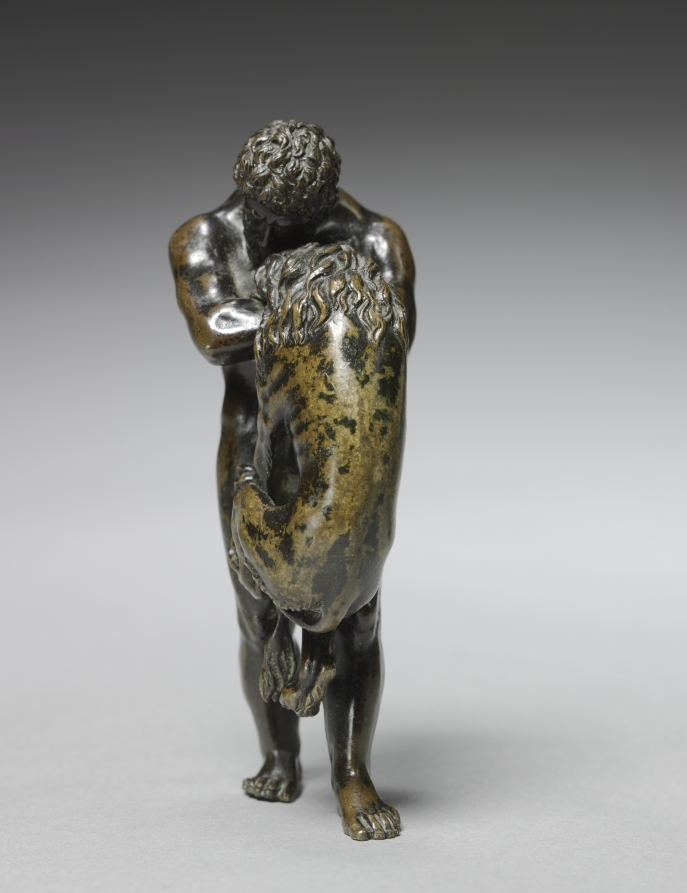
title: Hercules and the Nemean Lion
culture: Italy or France, 16th century or later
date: 1500s or later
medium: bronze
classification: Sculpture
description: The original owner of this work would have understood that this scene referred to the entire story of Hercules, the demi-god who had to accomplish twelve labors. The lion is named after the city of Nemea, near Corinth, a monstrous beast sent by the goddess Hera to wreak havoc on the area. After killing the lion, Hercules wore his pelt, commonly seen in other representations of the hero.